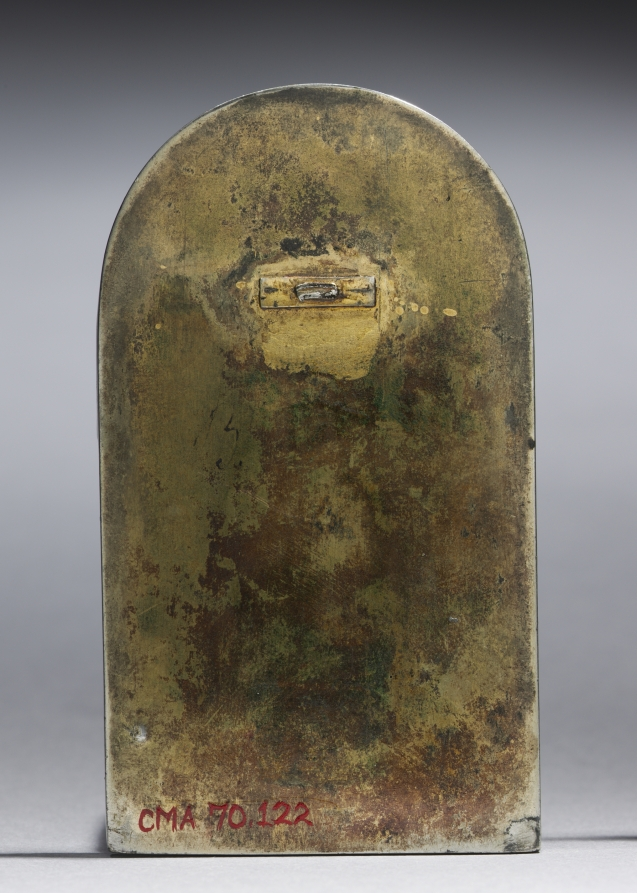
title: Martyrdom of a Saint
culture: Northern Italy, early 16th century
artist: Hermann Samuel Ratzerdorfer (Austrian, 1815–1891)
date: after 1866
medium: silver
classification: Sculpture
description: Recent research has revealed that this plaquette—long characterized as an Italian object from the 1500s—is indeed by the hand of a 19th-century silversmith working in Vienna. The subject of the Renaissance-style object also cannot be precisely identified, although it was long associated with the beheading of Saint Paul.